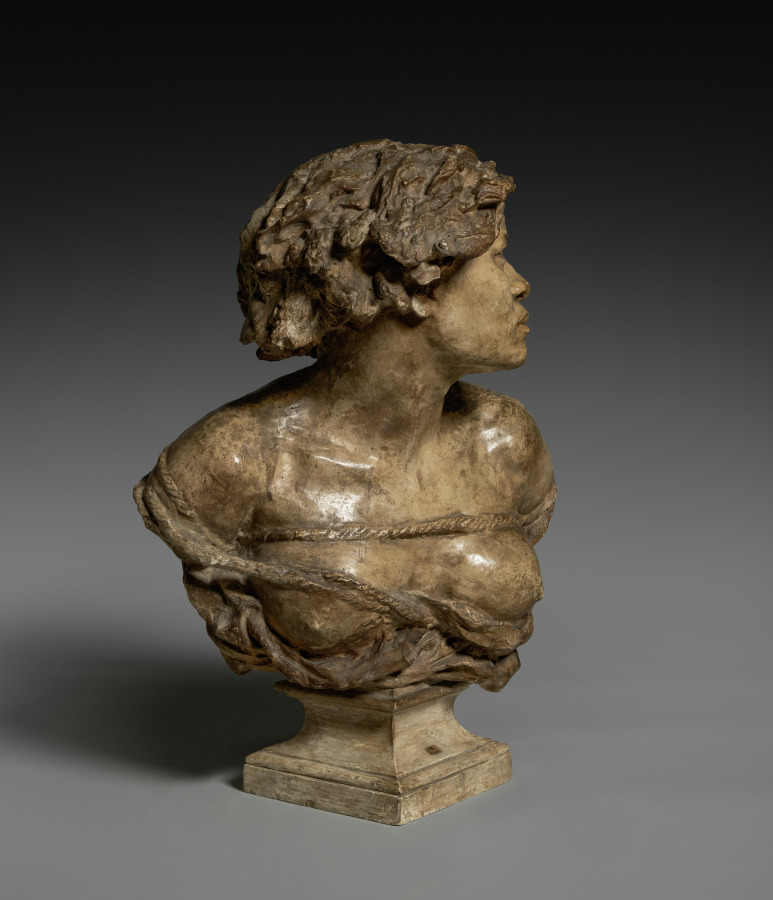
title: Why Born Enslaved!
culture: France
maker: Jean-Baptiste Carpeaux (French, 1827–1875)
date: 1867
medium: Plaster, original polychromed surface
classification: Sculpture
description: One of the most powerful expressions of abolitionist sentiment in the visual arts, Why Born Enslaved! depicts an African woman bound by ropes and looking defiantly upward. The ropes press painfully into her breasts; her torn blouse alludes to the violence responsible for her condition. The original, polychromed surface is covered with complex, nuanced hatchings and subtle modeling. Evidence indicates that this masterpiece of 19th-century French sculpture served as the master model for numerous casts in other museum collections.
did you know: Although officially abolished in France since 1848, slavery remained a hotly contested issue in Carpeaux’s time as it remained legal or tolerated in various countries around the world.